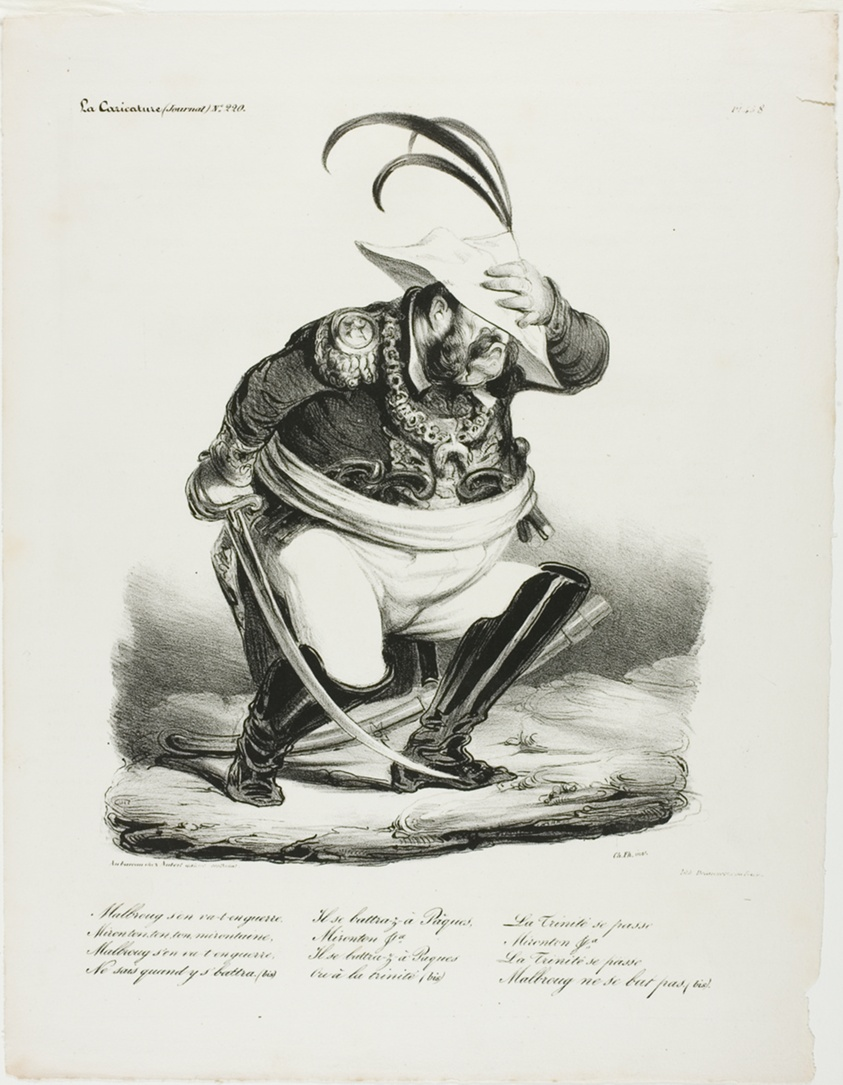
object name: Print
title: Malbroug s'en va-t-en Guerre...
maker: Honoré Victorin Daumier; French, 1808-1879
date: 1835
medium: Lithograph in black on white wove paper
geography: France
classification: lithograph; print; prints and drawing